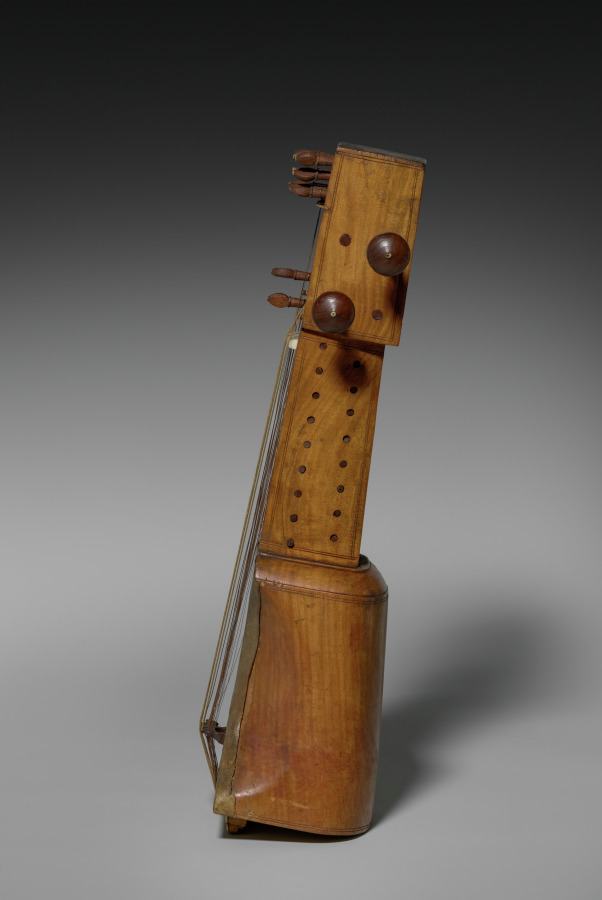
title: Sarangi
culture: India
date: 1800s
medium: Wood, parchment, bone or ivory, wood inlays, gut, and copper strings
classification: Musical Instrument